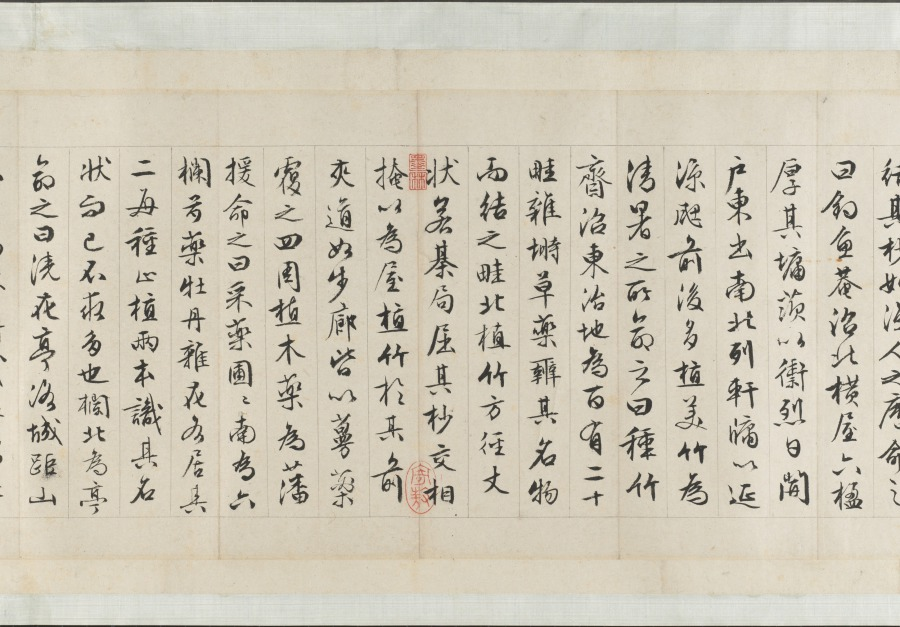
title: Garden for Solitary Enjoyment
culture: China, Ming dynasty (1368–1644)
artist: Qiu Ying (Chinese, 1494–1552)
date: 1515–52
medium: Handscroll; ink and light color on silk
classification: Painting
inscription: Accompanying text of an essay together with seven poems of Sima Guang (1019–1086) and one poem of Su Shi (1037–1101) written by Wen Zhengming (1470–1559) in 1558.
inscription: 2 colophons and 82 seals: 4 seals of Wen Zhengming 文徵明 (1470–1559); 59 seals of Xiang Yuanbian 項元汴 (1525–1590); 1 colophon, dated 1644, and 7 seals of Xiang Yukui 項禹揆 (c. late 1500s–1659); 1 colophon, dated 1880, and 2 seals of Weng Tonghe 翁同龢 (1830–1904); 2 seals of Ch'eng Chen-i (19th c.); 1 seal of Han Ch'ung (19th c.); 4 seals of Wan-go H. C. Weng 翁萬戈 (1918–2020); 3 seals unidentified.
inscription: Colophon by Xiang Yukui 項禹揆 (c. late 1500s–1659): The painting of The Garden for Self-enjoyment on the right by Shih-chou, Mr. Qiu [Qiu Ying] is in the style of Li Lung-mien. Its mood is peaceful, as if meeting the ancient gentlemen face to face among the brushes and silk; it lifts one above the sordid bustle of life. Formerly, my late father handed me this scroll which had only the painting without the written essay. I considered asking a good calligrapher to write the essay to add to it but was afraid that the quality of the writing would not match the painting. Several years later, I saw at a friend's house this essay and poems (of Ssu-ma Kuang] written by Hengshan [Wen Zhengming], once owned by my grandfather; so I spared no expense to obtain it. I rejoiced at this and said: "The divine swords are finally united. How things are pre-destined!" Now my friend Chang Kung-chao's technique for mounting [painting and calligraphy] is excellent. Therefore by daring to take them out and join them together, I can preserve this beautiful story of singular reunion. Xiang Yukui recorded at Hai-yeh-t'ang [hall] two days before New Year's Eve in the jiasheng year of the Chongzhen era [1644]. trans. LYSL/HK/WKH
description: Garden of Solitary Enjoyment refers to a site built in 1073 by the statesman Sima Guang (1019–1086) after he had retired to Luoyang, Henan province. Every spring, visitors would flock to his garden. Each of its seven structures references a historic figure. Sima wrote: I channel streams [like Du Mu], to water flowers [like Bai Juyi], or trim bamboo [like Wang Huizhi]. . . . I know of no joy between heaven and earth that could take its place. Qiu Ying’s painting, created after an 11th-century version of the same theme, must have appealed to garden owners of the Ming dynasty, since it became the template for numerous Suzhou workshop copies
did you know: Sima Guang completed his monumental survey of Chinese history, Zizhi tongjian, in the garden depicted in this painting.